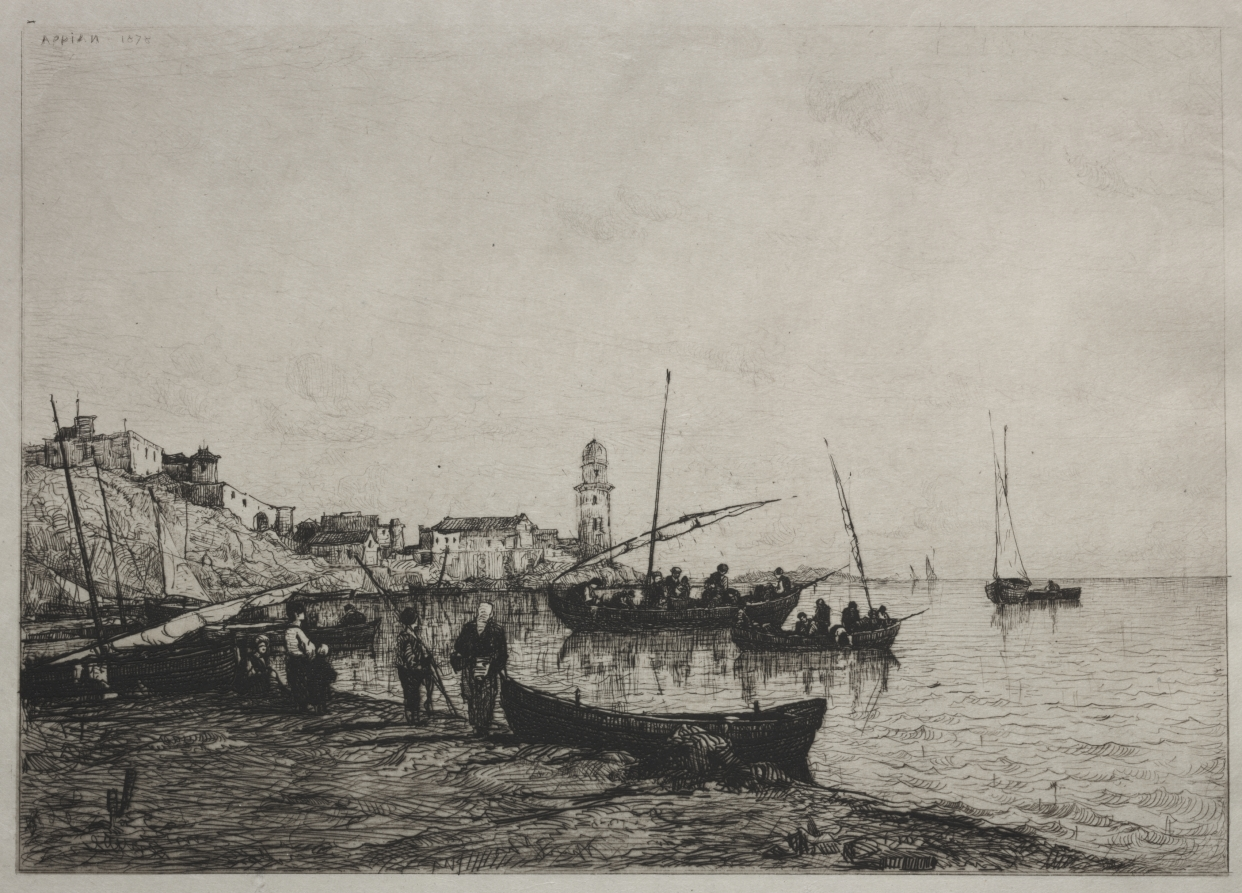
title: Return of the Fishing Boats at Collioure, near the Spanish Border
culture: France, 19th century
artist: Adolphe Appian (French, 1818–1898)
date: 1878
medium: etching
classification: Print